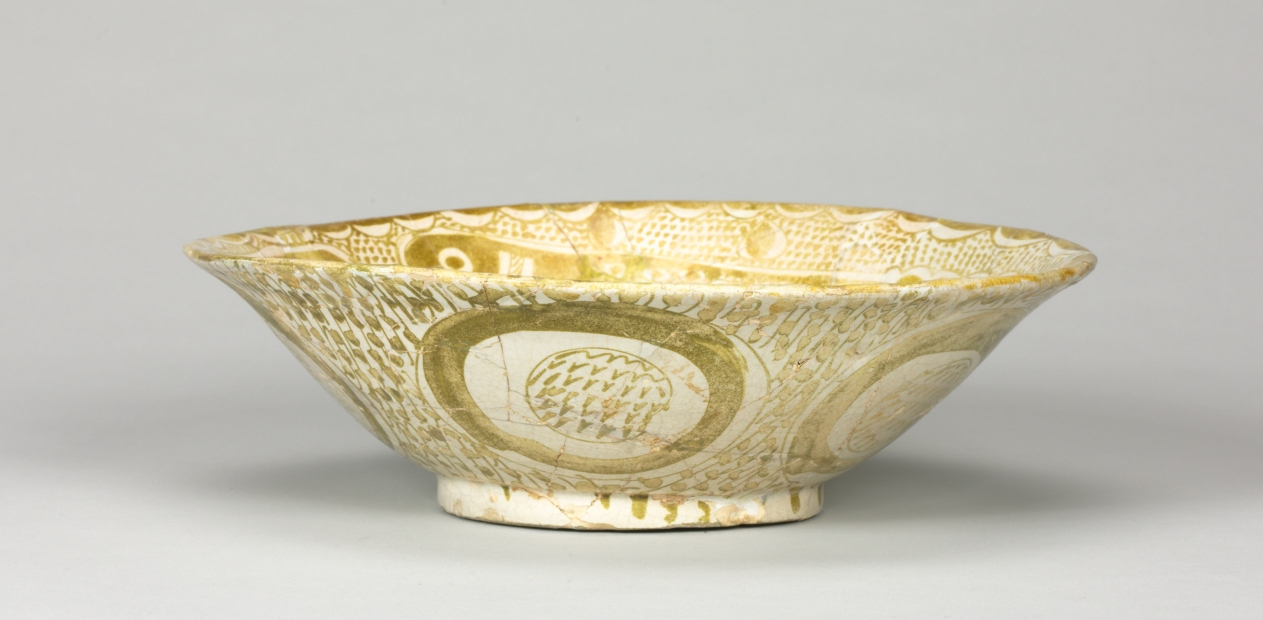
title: Luster Bowl with Man Holding a Banner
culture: Iraq, probably Baghdad, Abbasid Period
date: 900s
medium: earthenware with luster-painted design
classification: Ceramic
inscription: One undecipherable inscription on the foot ring on the outside.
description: This golden bowl displays a man holding a staff with a banner surmounted by a ball, crescent, and long streamer. He is flanked by two peacocks, one holding a palmette in his beak.